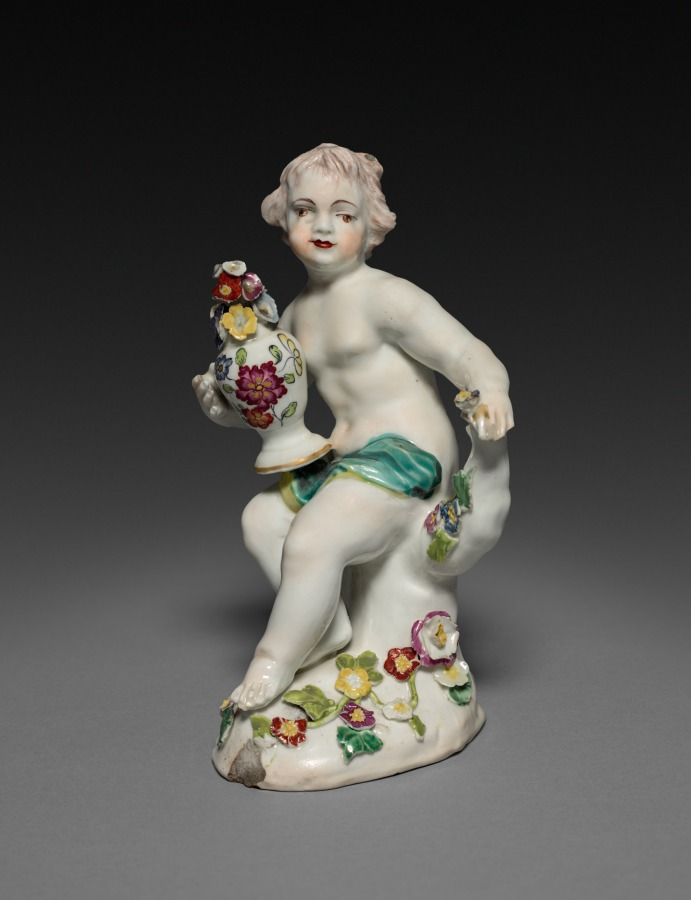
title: Spring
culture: England, Derby, 18th century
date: c. 1760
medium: soft-paste porcelain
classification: Ceramic